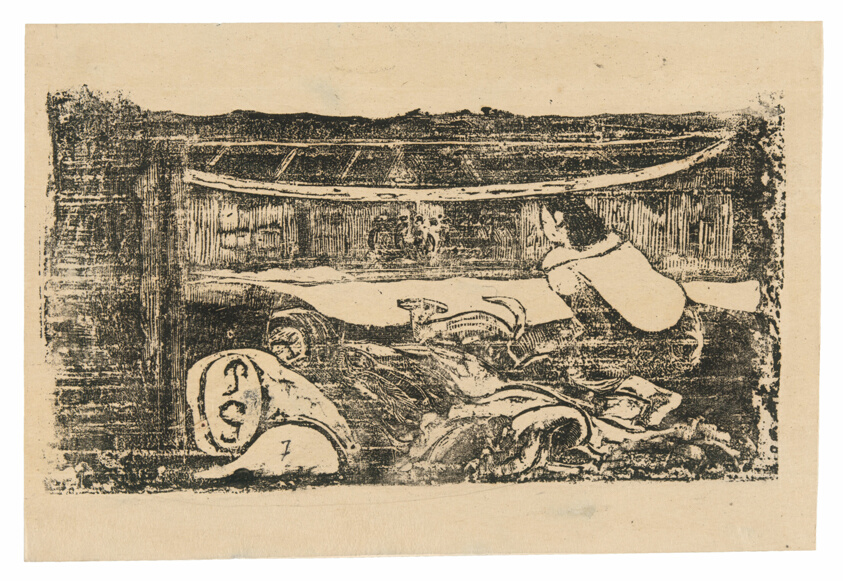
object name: Print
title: Interior of a Tahitian Hut, from the Suite of Late Wood-Block Prints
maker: Paul Gauguin (French, 1848-1903)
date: 1898/99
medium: Wood-block print in black ink on thin ivory Japanese paper, laid down on cream wove paper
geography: France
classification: woodcut; print; prints and drawing